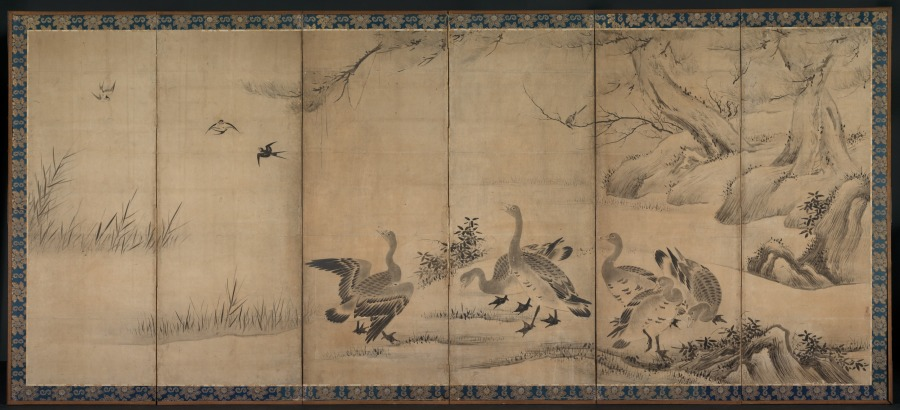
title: Wild Geese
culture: Japan, Edo period (1615–1868)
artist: Kano Sanraku (Japanese, 1559–1635)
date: late 1500s-early 1600s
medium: pair of six-fold screens; ink on paper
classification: Painting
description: Depictions of geese usually appear as ink paintings in Japan during the 1200s. They later show up in the colorful landscapes of illustrated handscrolls. Such early ink renditions of the birds have long been associated with classical Chinese Zen painting and poetry, which was avidly admired and collected in medieval Japan. In these screens the artist portrayed the waterfowl in a pastoral setting without reference to classical or religious themes. Such ordinary subjects were imbued with special meaning in 14th- and 15th-century Japan through associations with continental culture, Zen thought and poetry, and famous Chinese monk-painters whose painting techniques had become revered as visual emblems of Zen principles. The screens here reflect the continuation of that painting tradition in the late 1500s or early 1600s by the head of the most important studio in Kyoto. Sanraku also executed a number of colorful folding screen compositions, but here he pays homage to the style of early Zen painting.